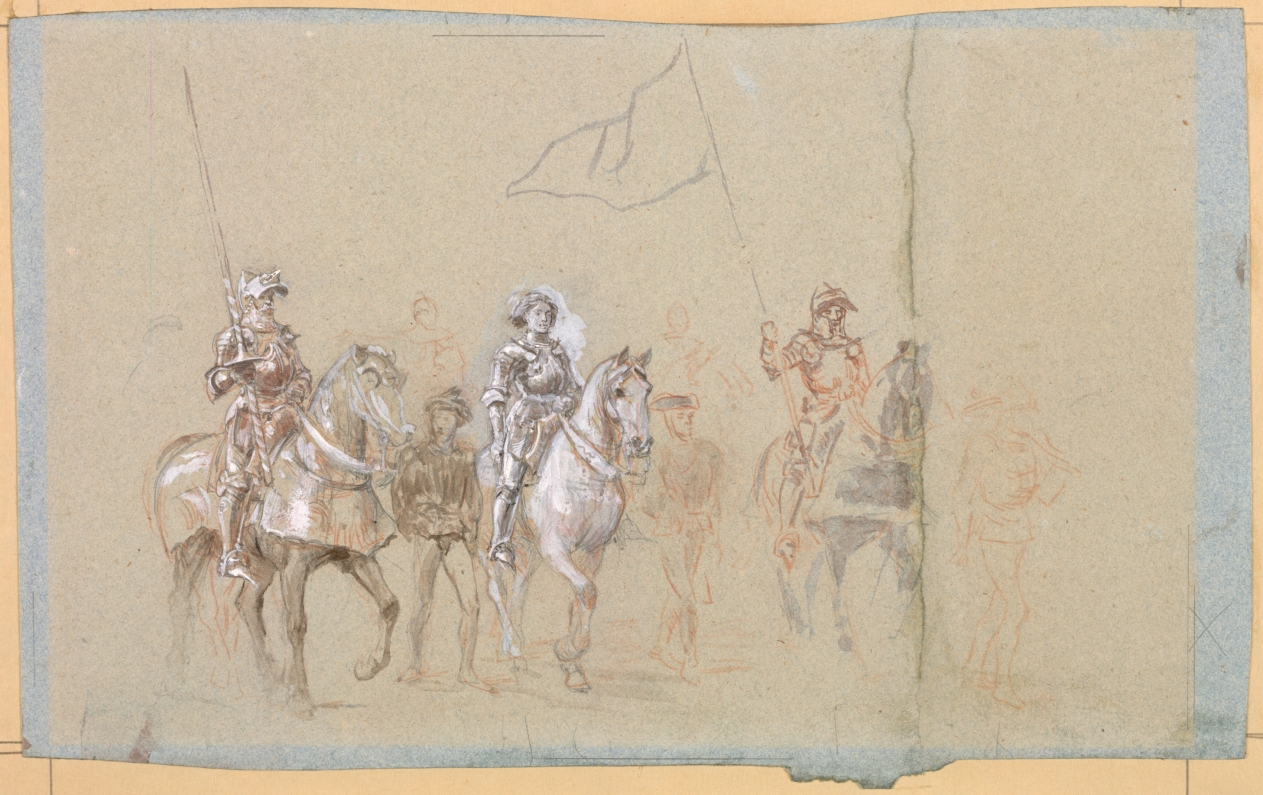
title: Joan of Arc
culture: France, 19th century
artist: Ernest Meissonier (French, 1815–1891)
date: c. 1889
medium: graphite, red chalk, colored washes, and black and white gouache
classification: Drawing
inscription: Signed with monogram, lower left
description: This drawing is a rare study relating to Ernest Meissonier's never-realized mural for the Pantheon in Paris. After seeking and receiving the commission in 1874, Meisonnier procrastinated on the project for many years. Here, the French heroine Joan of Arc appears at center, without a helmet, on a bare white horse, staring ahead with steadfast calm. The figure of Joan in this drawing appears to correspond to the subject in a now-lost design for the complete painting, which Meissonier presented in 1889.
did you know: Ernest Meisonnier found the original subject proposed for his Pantheon mural commission—Saint Geneviève—to be uninspiring and instead proposed an allegorical Triumph of France featuring Joan of Arc alongside Charlemagne and Napoleon Bonaparte, among others.